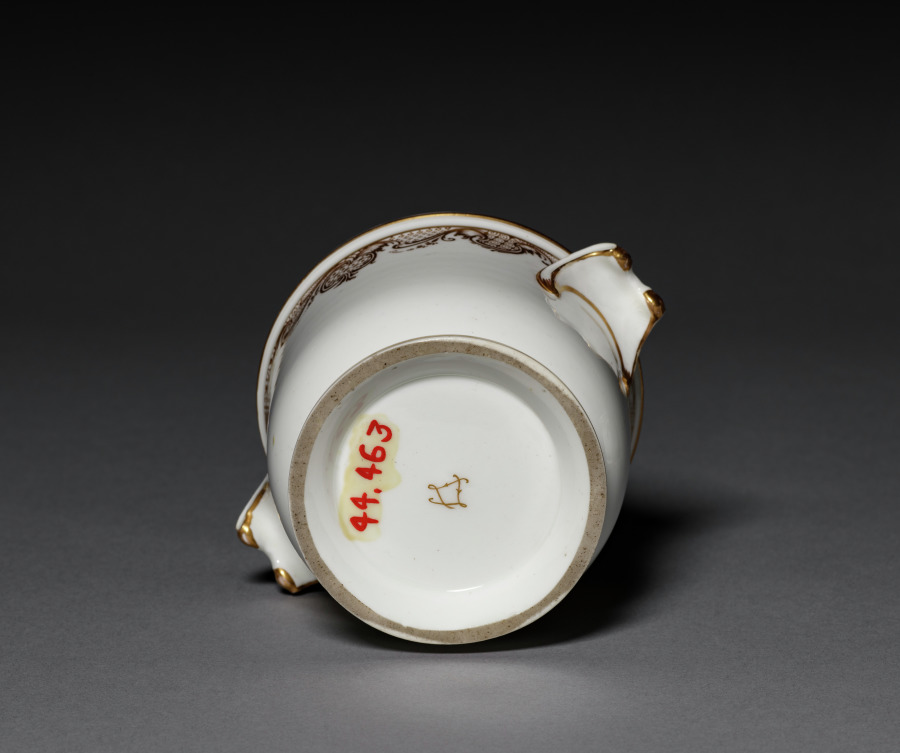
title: Flower Pot (1 of 2)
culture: France, Vincennes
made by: Vincennes Porcelain Factory (France, 1740–56)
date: 1745–53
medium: soft-paste porcelain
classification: Ceramic